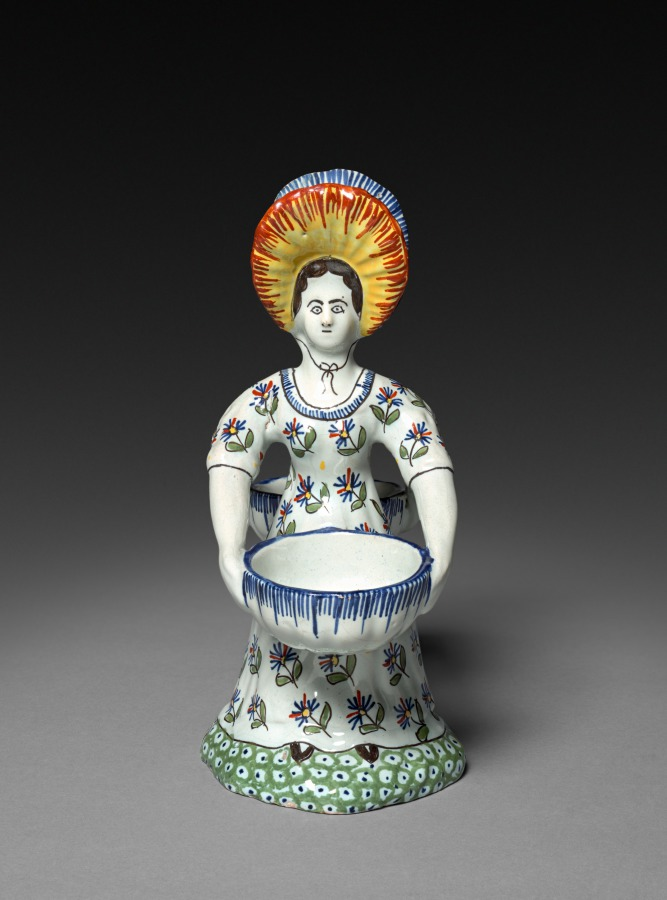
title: Double-faced Figure of a Woman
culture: France, Clermont-Ferrand, 18th century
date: 1792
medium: faience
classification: Ceramic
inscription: at bottom of skirt on outside in black: "1792."